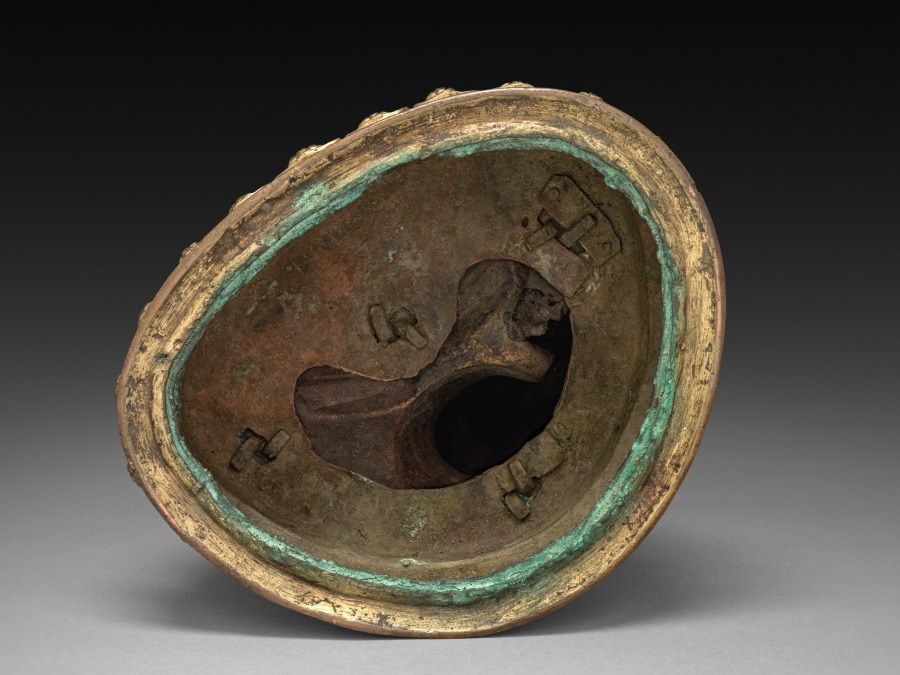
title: Buddhist Triumphant over Temptation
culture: China, Yuan dynasty (1271-1368)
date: c. 1300–1320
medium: gilt bronze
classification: Sculpture